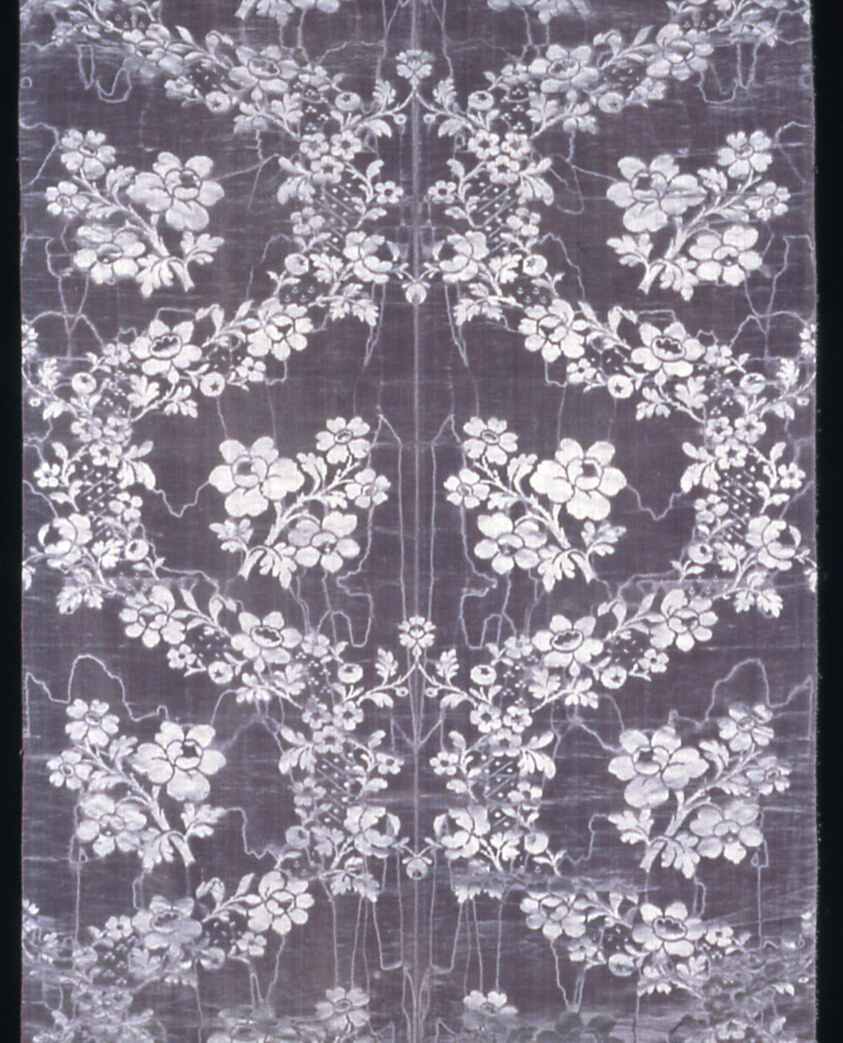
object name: Textile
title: Panel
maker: England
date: 1750/60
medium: Silk, satin weave self-patterned by areas of plain weave; moiré "watered"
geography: England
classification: textile; weaving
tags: flowers